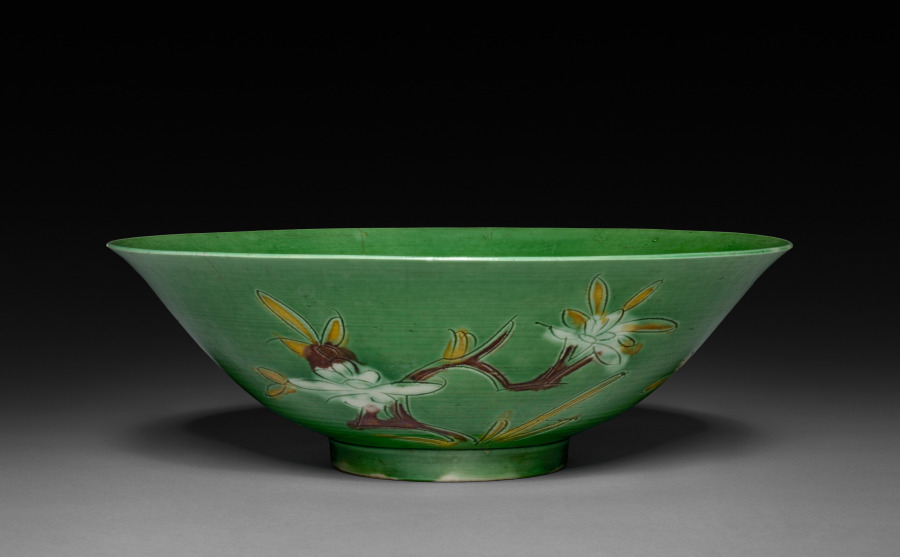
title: Bowl with Sprays of Flowers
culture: China, Jiangxi province, Jingdezhen kilns, Qing dynasty (1644-1911), Kangxi reign (1662-1722)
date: 1662–1722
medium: porcelain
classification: Ceramic